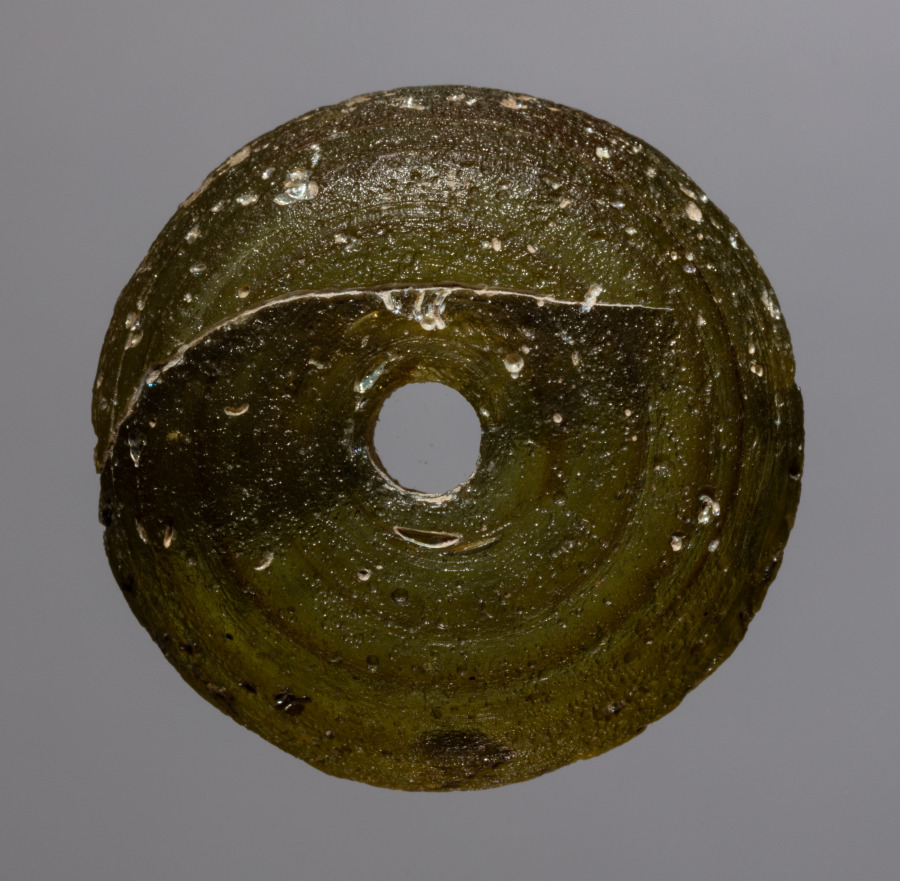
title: Spindle Whorl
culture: Iran, early Islamic period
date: 700s - 900s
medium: glass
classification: Spindle Whorl